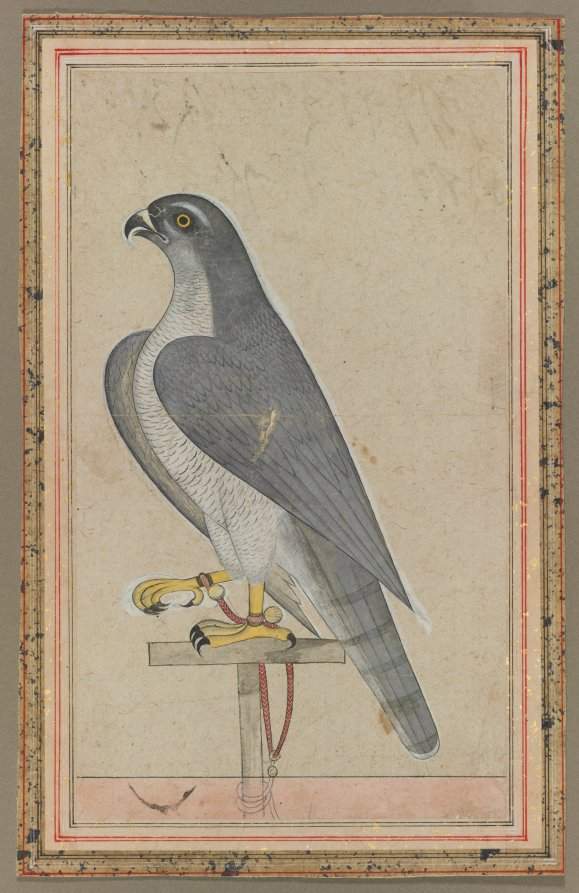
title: Falcon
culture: Northern India, Pahari kingdoms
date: c. 1770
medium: Gum tempera and gold on paper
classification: Painting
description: The imperial Mughal practice of keeping portraits of animals was adopted by art patrons and collectors in small states and kingdoms under the umbrella of the Mughals. Falconry, the sport of hunting small game with a bird of prey, was a popular activity among the highest ranks of Mughal royalty. The falcon depicted in this painting appears to be a peregrine. Cords with bells keep the trained hunting bird tethered to its roost.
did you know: Indian artists used white-out, white paint, to cover mistakes and make changes.